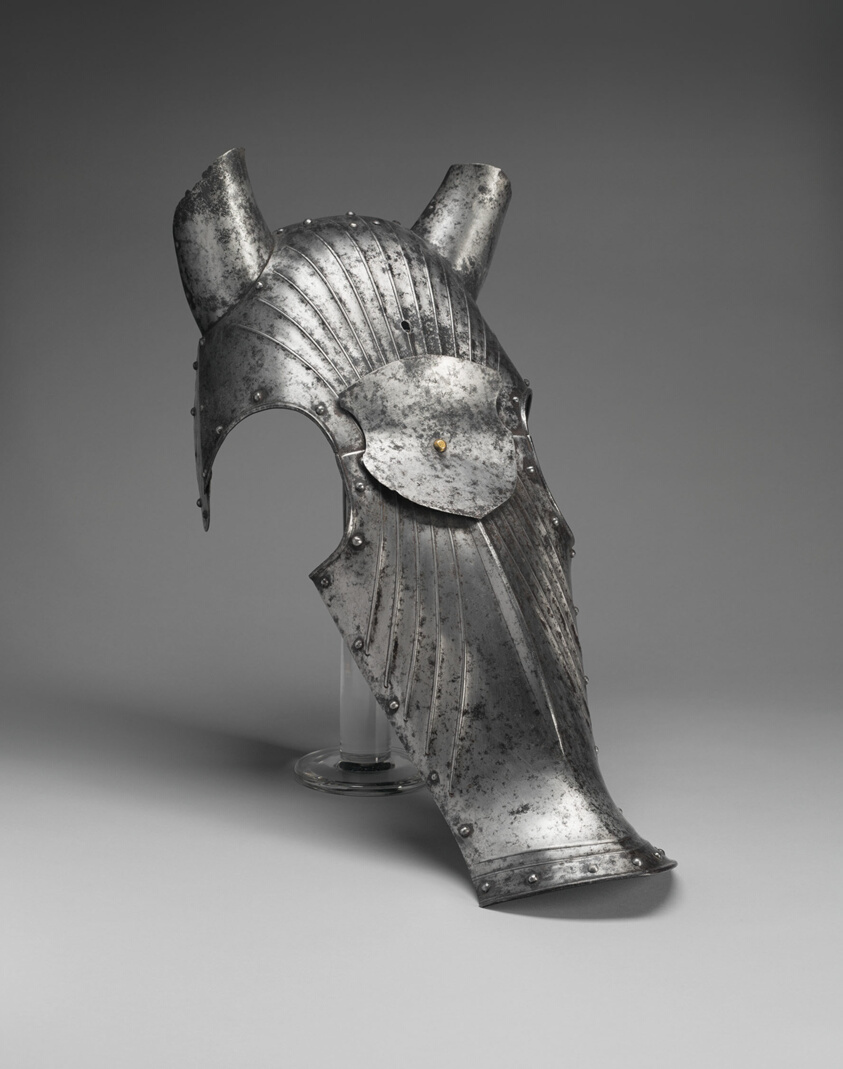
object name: Armor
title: Shaffron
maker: Southern German, Nuremberg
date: c. 1520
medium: Steel and leather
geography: Nuremberg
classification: horse equipment; armor; arms and armor